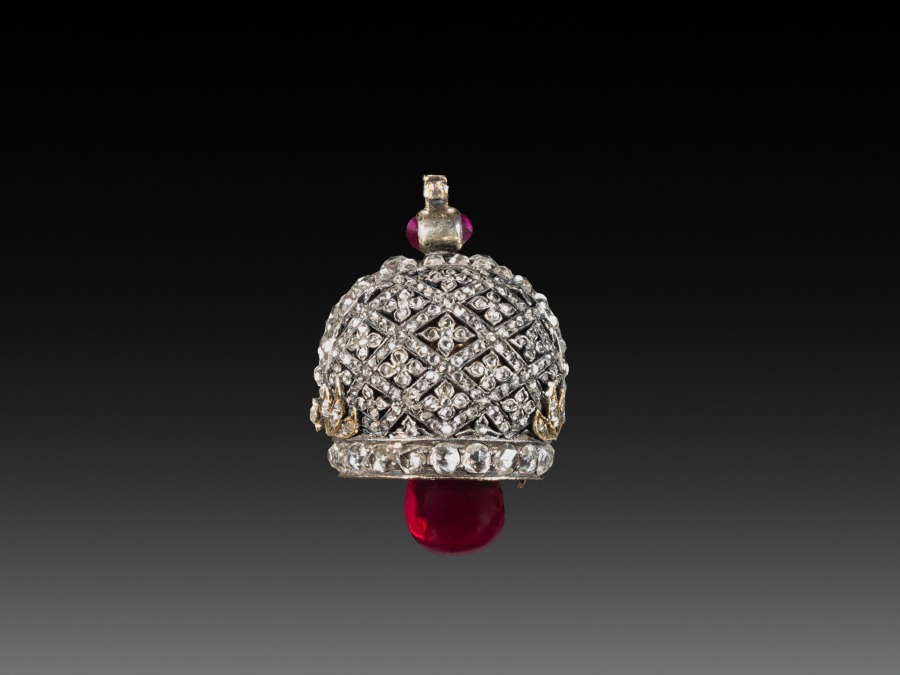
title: Miniature Crown Surprise from the Lapis Lazuli Easter Egg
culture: Russia, St. Petersburg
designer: attributed to Peter Carl Fabergé (Russian, 1846–1920)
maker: attributed to House of Fabergé (Russian, 1842–1918)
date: c. 1885–90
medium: gold, enamel, lapis lazuli, pearls, diamonds, rubies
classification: Miscellaneous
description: This Easter egg, like the subsequent ones produced by Fabergé for the imperial family, contains a surprise when opened. In this case, the egg opens to display a yellow enameled cover, resembling an egg yolk, which then opens to reveal a tiny replica of the Russian imperial crown, containing either a ruby or a pink sapphire suspended on a chain.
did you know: The tiny diamond encrusted crown surprise is a replica of the Russian imperial crown made for Empress Catherine the Great in the 1700s.